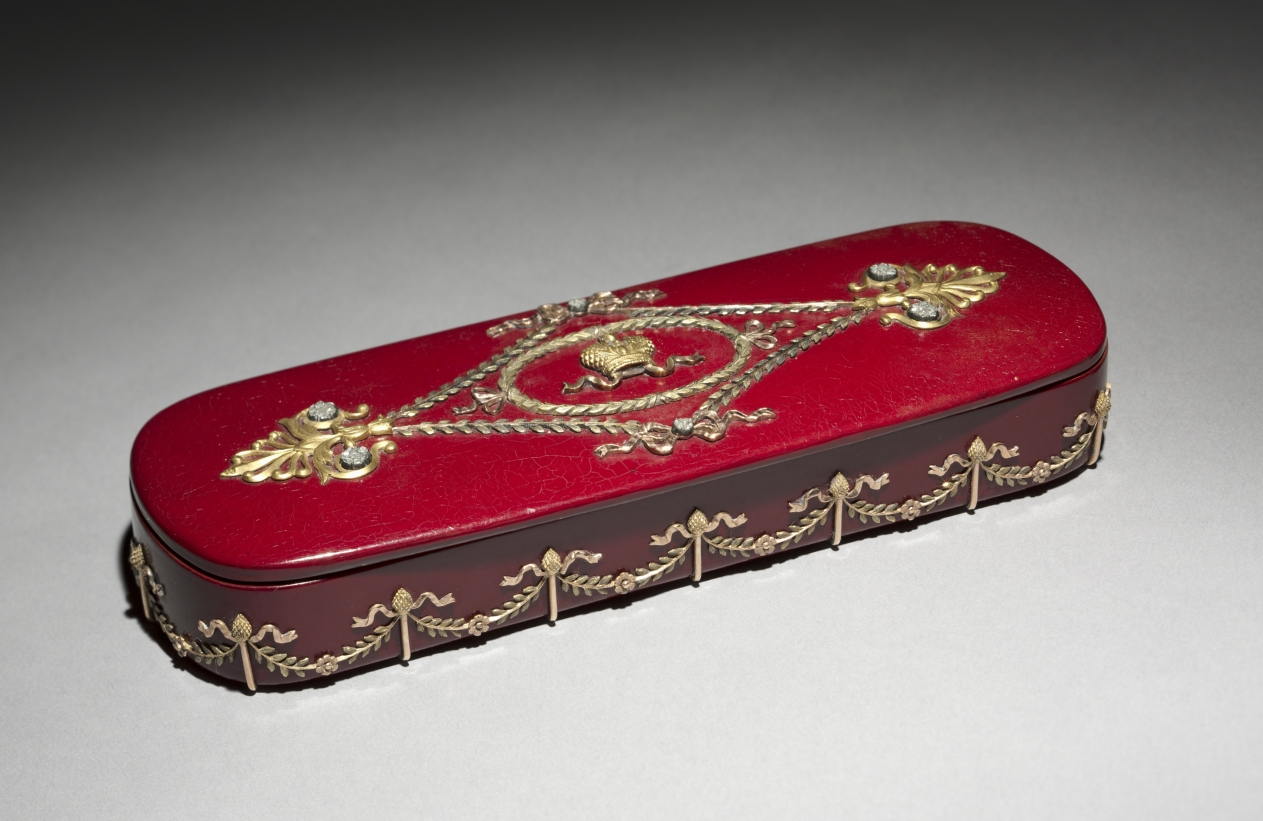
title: Lacquer Box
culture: Russia, St. Petersburg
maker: House of Fabergé (Russian, 1842–1918)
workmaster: Factory N. Lukutin (Russian)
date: c. 1890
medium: lacquer, papier-mâché, gold, diamonds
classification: Miscellaneous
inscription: inscribed (inside cover): Factory N. Lukutine (in Cyrillic script in gold); three double-headed eagles in gold.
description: This lacquer box was created by the Lukutin Factory, which was well known for creating boxes such as this one after Piotr Lukutin took charge of production and expanded the factory to include tea caddies and various desk accessories. This particular box from the Lukutin workshop is remarkable in its detailed gold patterns and diamond inlays that create an intentional contrast with the deep red surface.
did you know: Piotr Lukutin’s workshop employed over 50 skilled painters as well as acted as a school for training apprentices.